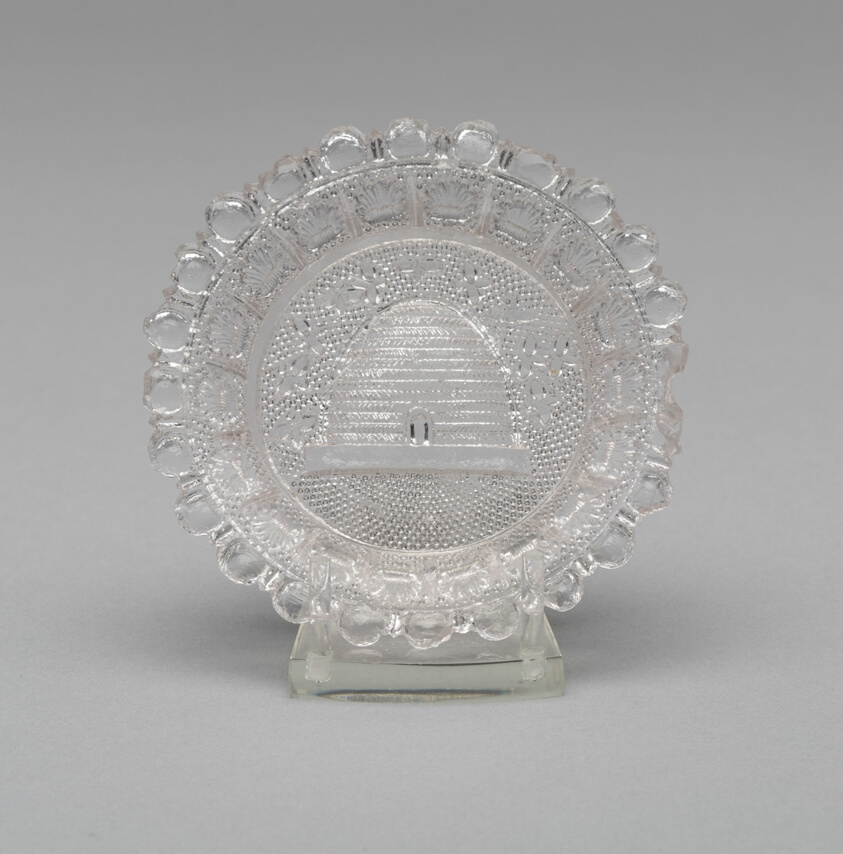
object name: Glass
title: Cup plate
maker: Artist unknown (American, 19th century); Midwest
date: 1830–35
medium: Pressed glass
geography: Midwest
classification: plate (general, dish); glass; american decorative arts; american arts; decorative arts